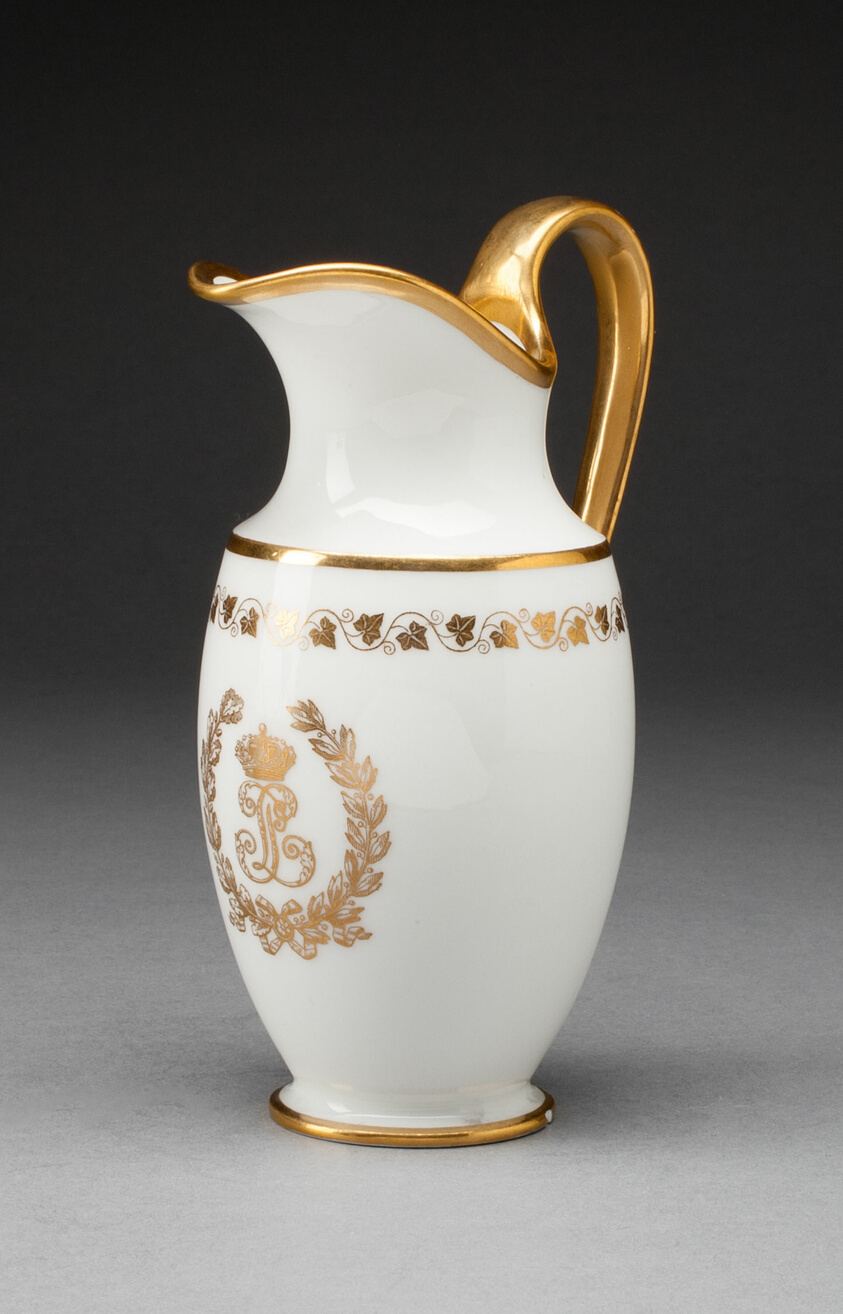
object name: Ceramics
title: Pitcher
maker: Sèvres Porcelain Manufactory; French, founded 1740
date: 1845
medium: Hard-paste porcelain and gilding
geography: Sèvres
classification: pitcher (vessel); tableware; vessel; porcelain; european decorative arts; ceramics